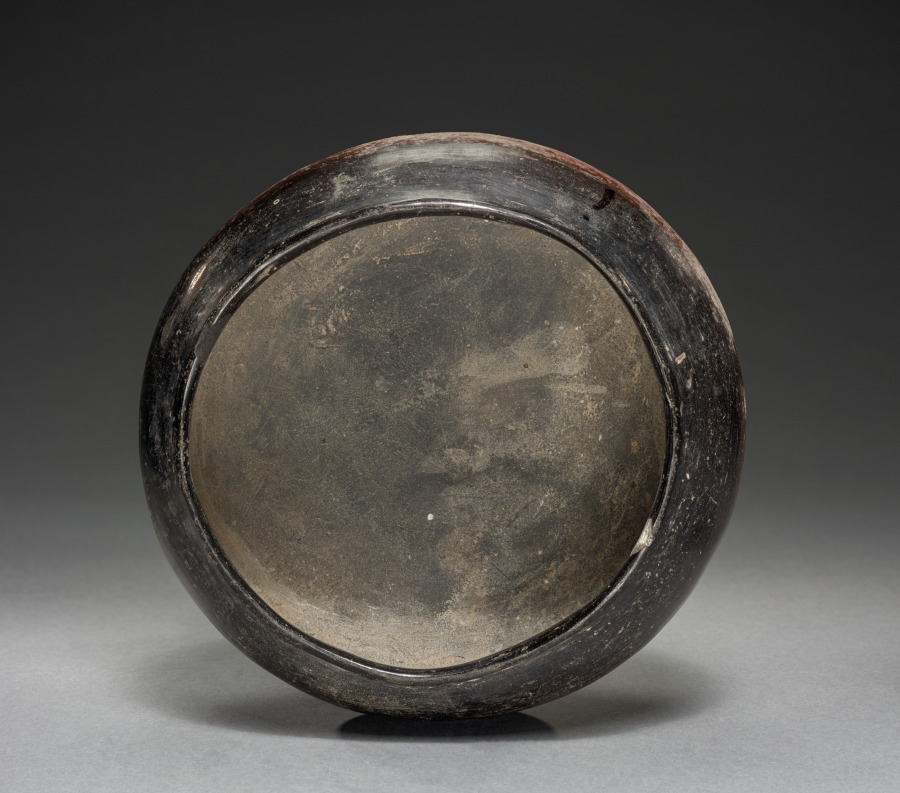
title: Black-Topped Bowl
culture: Egypt, Predynastic (5000–2950 BCE), Naqada II (3650–3300 BCE)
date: 4000–3000 BCE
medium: Nile silt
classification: Vessels